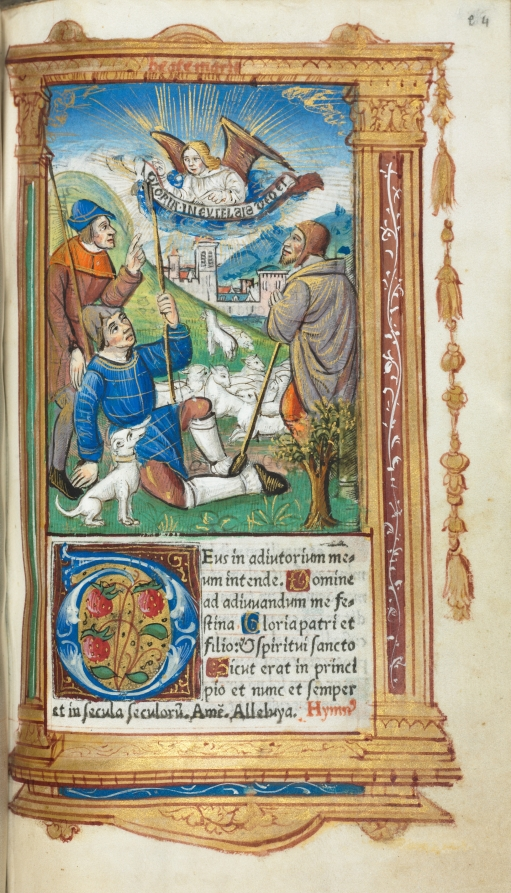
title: Printed Book of Hours (Use of Rome): fol. 36r, Annunciation to the Shepherds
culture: France, Paris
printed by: Guillaume Le Rouge (French, Paris, active 1493–1517)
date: 1510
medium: 112 Printed folios on parchment, bound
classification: Bound Volume